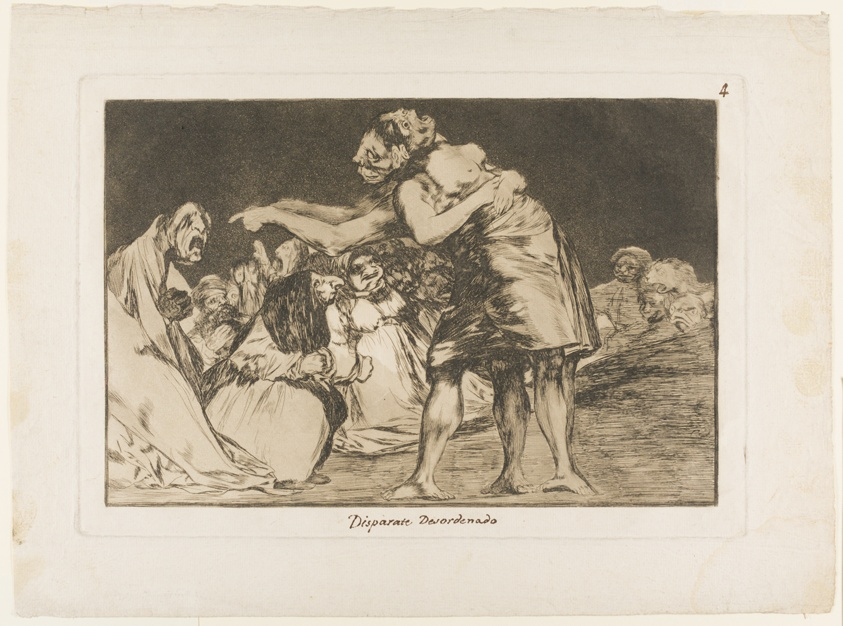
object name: Print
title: She Who is Ill Wed Never Misses a Chance to Say So, plate seven from Los Proverbios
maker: Francisco José de Goya y Lucientes (Spanish, 1746-1828)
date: 1815/24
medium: Etching, aquatint, and drypoint on ivory laid paper with inscriptions in brown ink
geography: Spain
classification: etching; print; prints and drawing